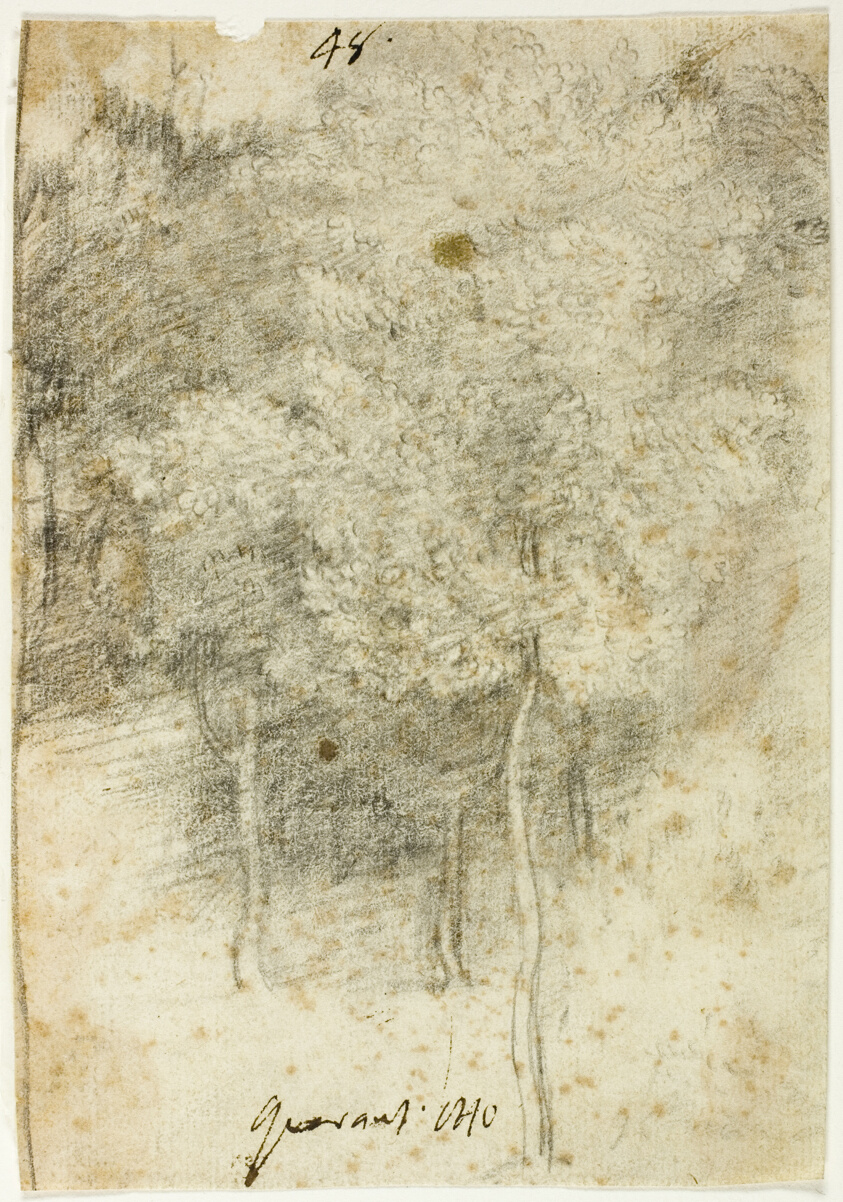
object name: Drawing and Watercolor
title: Grove of Trees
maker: Federico Barocci (Italian, c. 1535-1612)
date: 1600/12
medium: Black chalk, on ivory laid paper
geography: Urbino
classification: chalk; drawings (visual works); prints and drawing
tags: landscapes